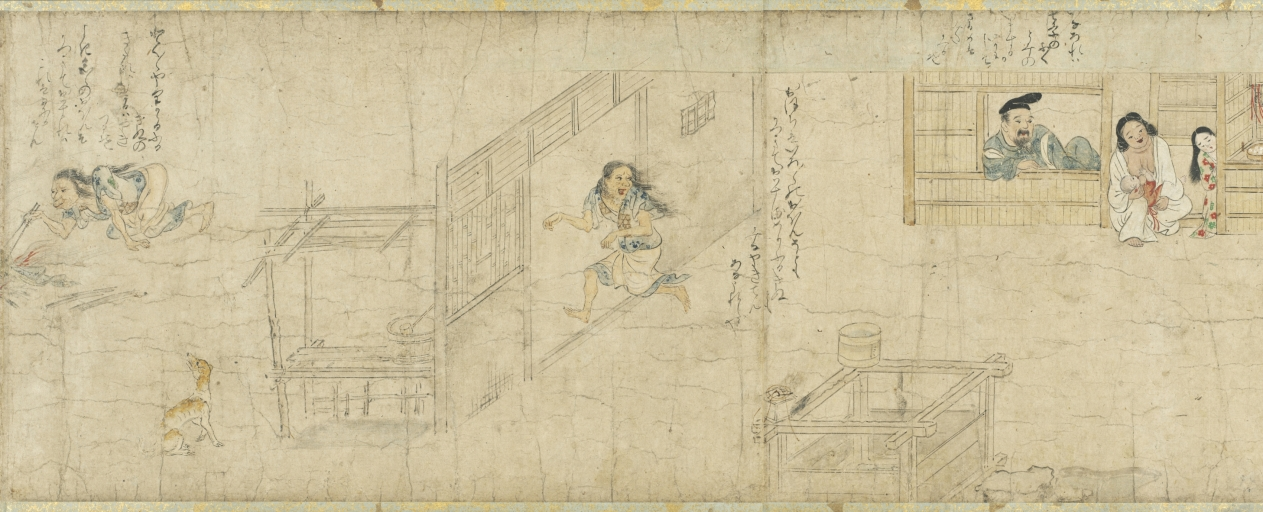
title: The Story of Fukutomi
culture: Japan, Muromachi period (1392–1573)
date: mid-1400s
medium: Handscroll; ink and color on paper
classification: Painting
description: This handscroll shows the second half of an odd tale in which a ne’er-do-well seeks the path to quick fortune and learns the art of musical flatulence. Prior to a major performance, a mentor (and competitor) advises him to consume morning glory seeds, a laxative. Thus, while performing he fouls himself and ends his days in humiliation. The audacious nature of this story and its presentation—well-animated figures with dialogue adjacent to the appropriate moments of action—create a primitive graphic novel. Japanese visual humor about farting preceded this story, but the satirical, mean-spirited twist in this tale suggests its intent was not merely to be humorous. The story was likely commissioned by court officials who disapproved of common performers rising to high positions, outflanking what was the accepted social order.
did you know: This scroll is treasured as the second oldest surviving version of this story.